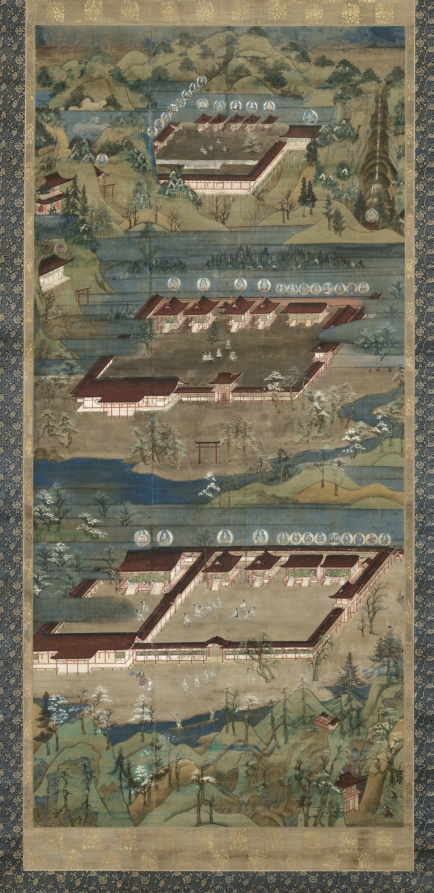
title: Mandala of the Three Shrines at Kumano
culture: Japan, Kamakura period (1185–1333) to Nanbokuchō period (1336–92)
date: 1300s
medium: hanging scroll; ink and color on silk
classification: Painting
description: This painting depicts the three shrines of Kumano from a bird’s-eye perspective, with the Buddhist counterparts of the kami of each shrine hall shown in discs directly above the halls. It also features figures, both pilgrims and deities, along the pilgrimage route and at the shrines. It is the only surviving work illustrating architectural representations of all three shrines in the same painting. They are compressed into a stacked composition, with the Nachi shrine at the top, the Shingū in the middle, and the Hongū at the bottom.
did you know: The sacred waterfall at the top right of the painting is called Nachi.